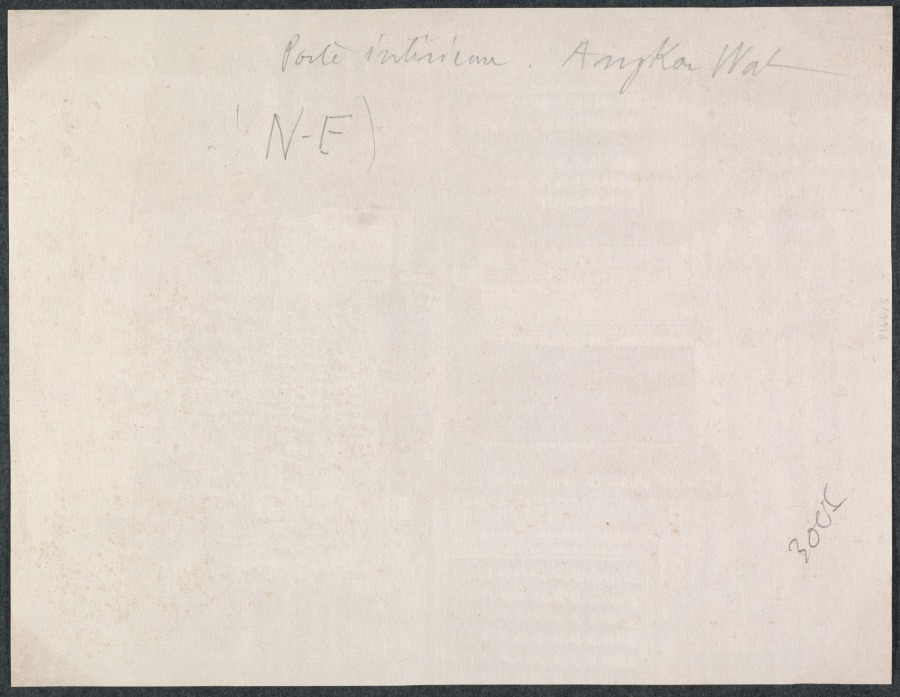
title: Doorway Through an Inner Enclosure, Angkor Wat, Cambodia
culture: India, 19th century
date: c. 1880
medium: Albumen print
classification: Photograph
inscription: Written in pencil on verso: "Porte interieur. Angkor Wat./(N-E)/3000" Imprinted in black type on adhesive label on polyethylene sleeve: "Anonyme (U658)/Porte interieur du temple d'Angkor Wat/Cambodge, circa 1880. Tirage albumen d'epoque 26.8 x 20.4cm/300.00"